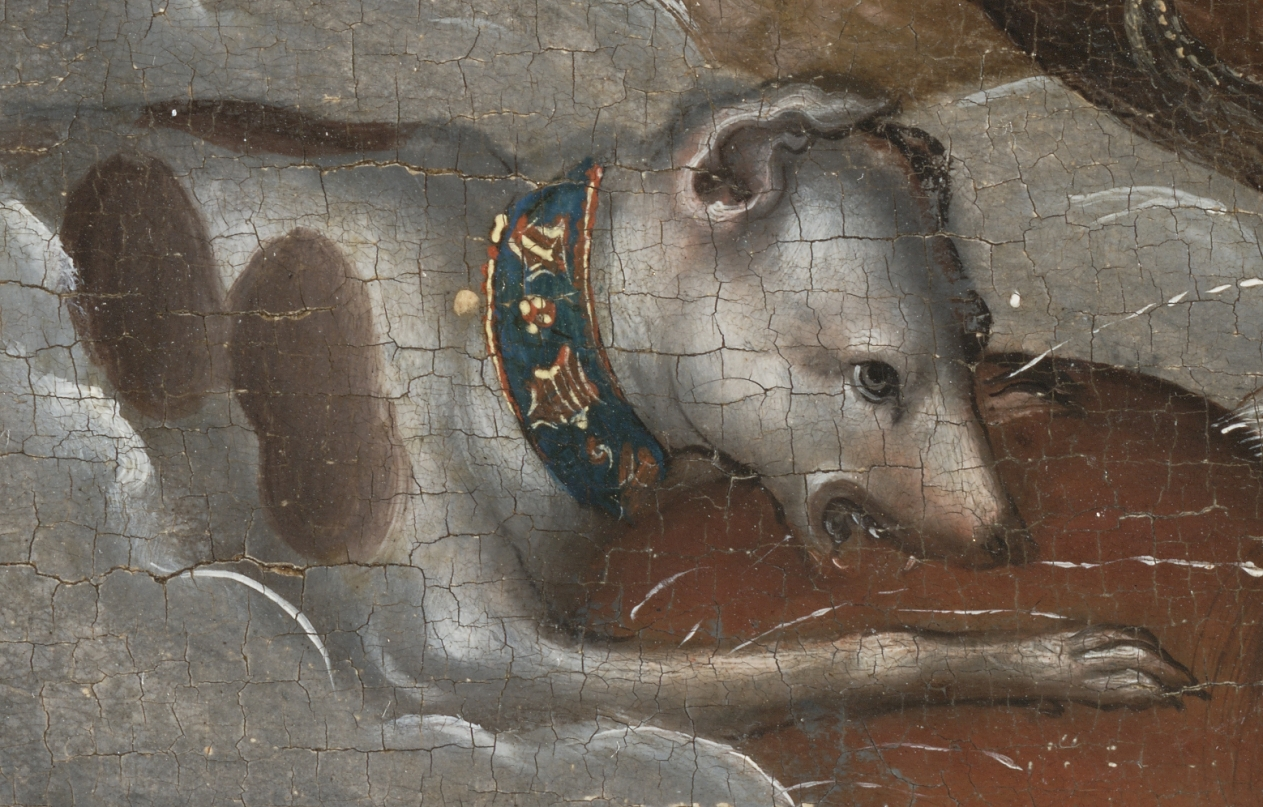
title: Hunting near Hartenfels Castle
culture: Germany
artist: Lucas Cranach (German, 1472–1553)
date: 1540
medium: oil, originally on wood, transferred to masonite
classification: Painting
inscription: Signed lower right on boat with a winged serpent, and dated: 1540 [inventory number, lower right: 1577]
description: The Protestant rulers of Saxony commissioned this animated hunt scene, set near their residence seen in the background, Hartenfels Castle (in eastern Germany). John Frederick the Magnanimous, in the bottom left corner, wears dark green hunting attire; he spans his crossbow and waits for his courtiers and dogs to chase a stag across the river. His wife, the Electress Sibylle, stands at right, poised to take the first ceremonial shot. The prince electors of Saxony were passionate practitioners of hunting with dogs—elaborate, highly rehearsed occasions, coordinated by the use of signals from hunting horns. Cranach dated this work and his signature is the winged snake at lower right. 1577 in the right corner is an inventory number.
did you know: Humans, dogs, and deer make up most of the creatures in this busy scene—but not all of them! Look closely at the background to spot a bear and three boars.